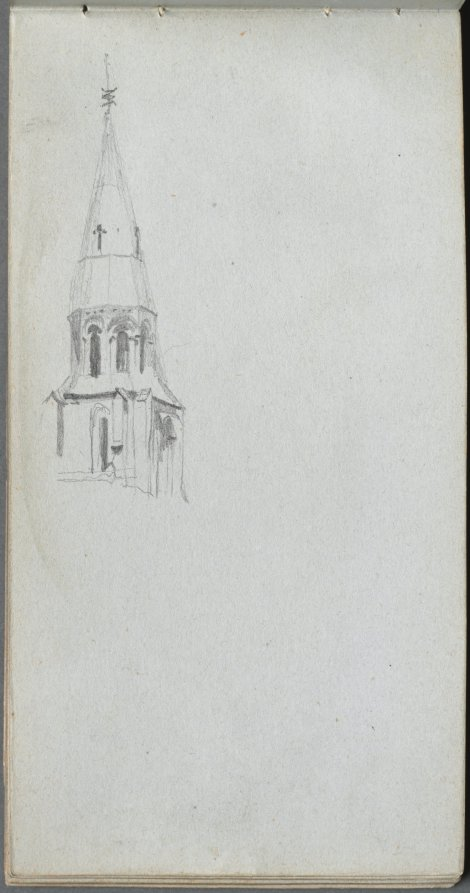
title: Sketchbook, page 44: Church Spire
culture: France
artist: Ernest Meissonier (French, 1815–1891)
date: c. 1860s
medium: graphite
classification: Bound Volume